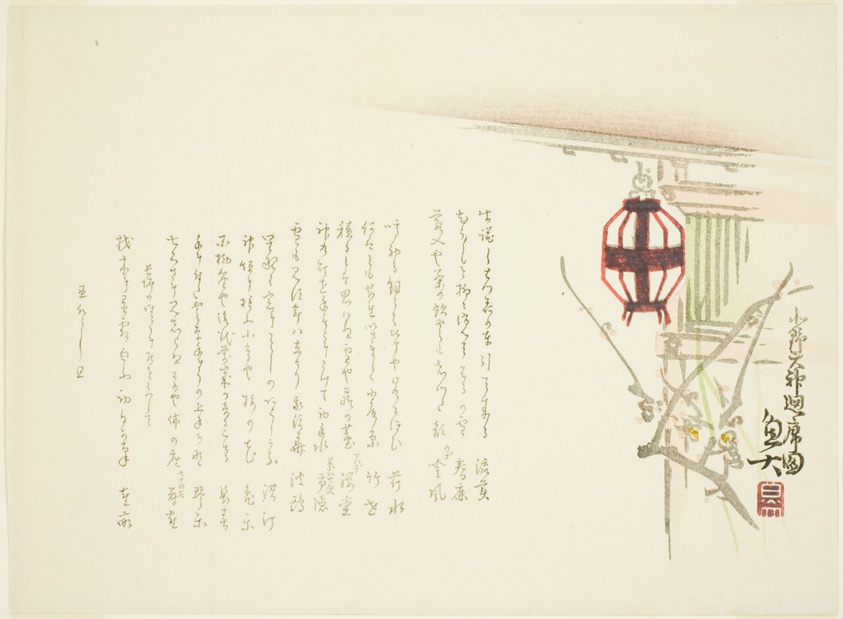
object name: Print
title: View of the encircling veranda of the Kitano Tenjin Shrine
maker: Sato Gyodai (Japanese, late 18th to mid-19th century)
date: c.1877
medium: Color woodblock print; surimono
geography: Japan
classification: print; asian art